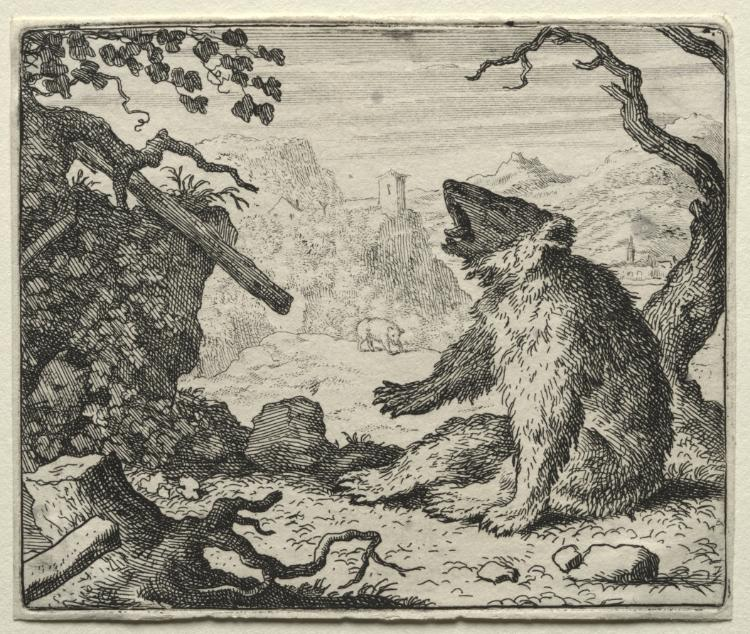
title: Reynard the Fox: The Bear Calls Reynard to Court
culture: Netherlands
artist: Allart van Everdingen (Dutch, 1621–1675)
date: 1650–75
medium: etching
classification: Print